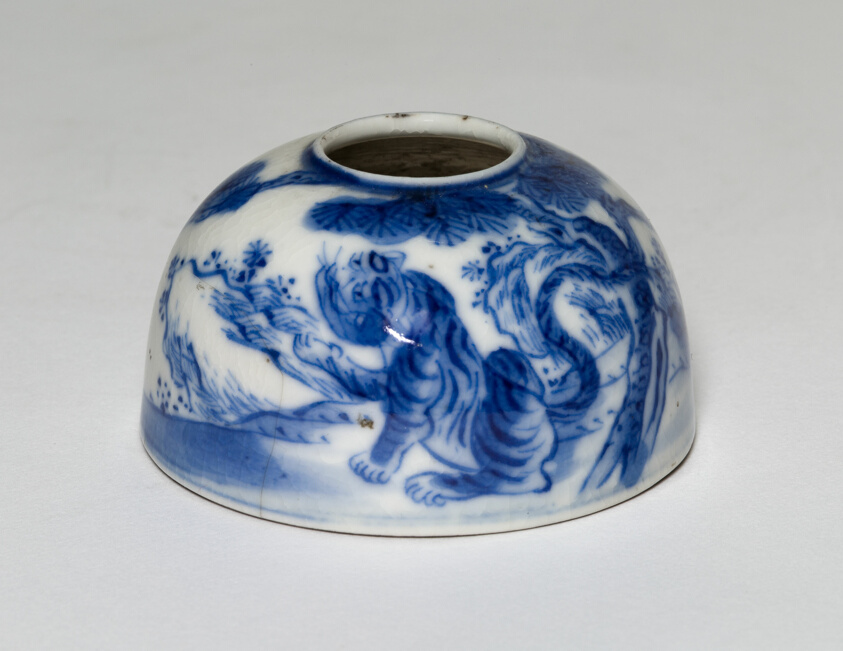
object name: Vessel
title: Miniature Brushwasher with Tiger in a Landscape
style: Chinese (culture or style)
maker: China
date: Qing dynasty (1644–1911)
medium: Porcelain painted in underglaze blue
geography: China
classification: stoneware; asian art; ceramics; vessel